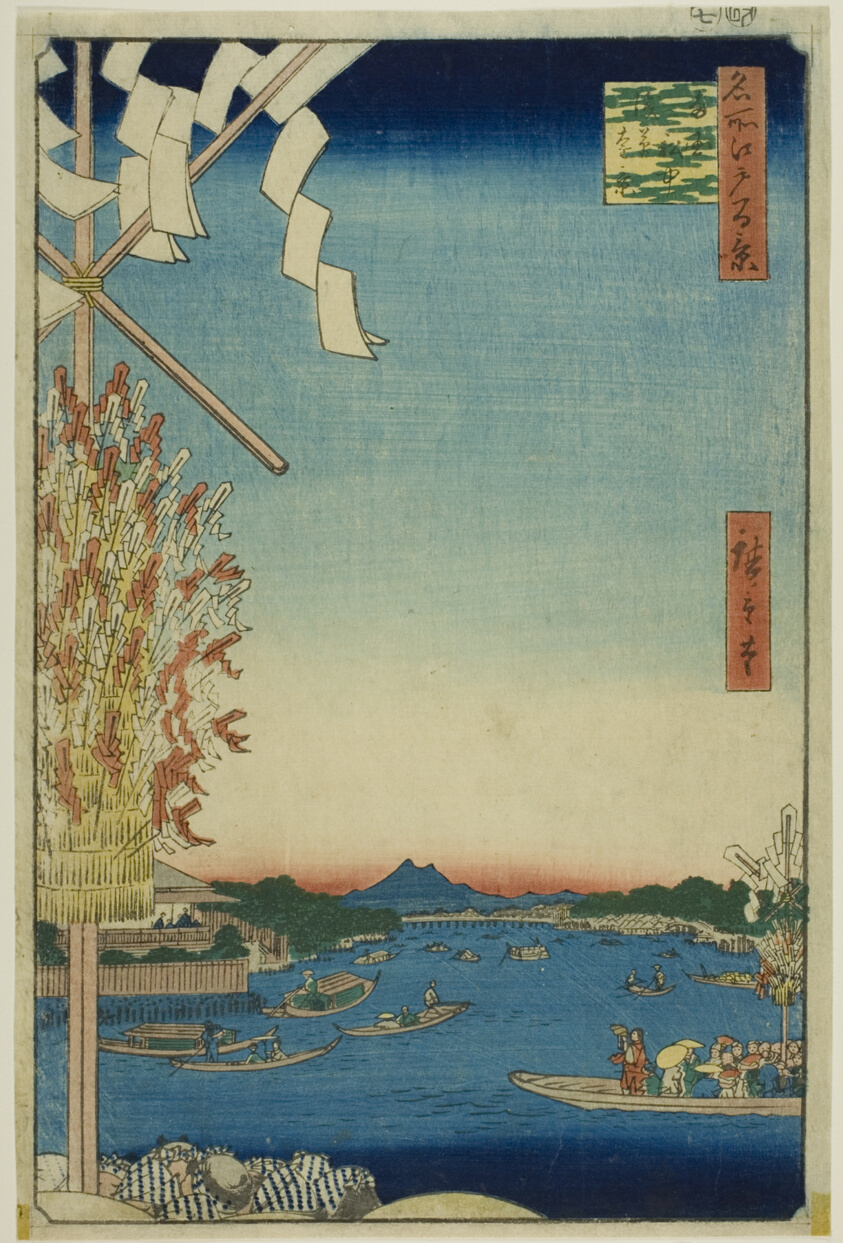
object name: Print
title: Asakusa River, Great Riverbank, Miyato River (Asakusagawa Okawabata Miyatogawa), from the series "One Hundred Famous Views of Edo (Meisho Edo hyakkei)"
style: Japanese (culture or style)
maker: Utagawa Hiroshige 歌川 広重; Japanese, 1797–1858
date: 1857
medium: Color woodblock print; oban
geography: Japan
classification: woodblock print; print